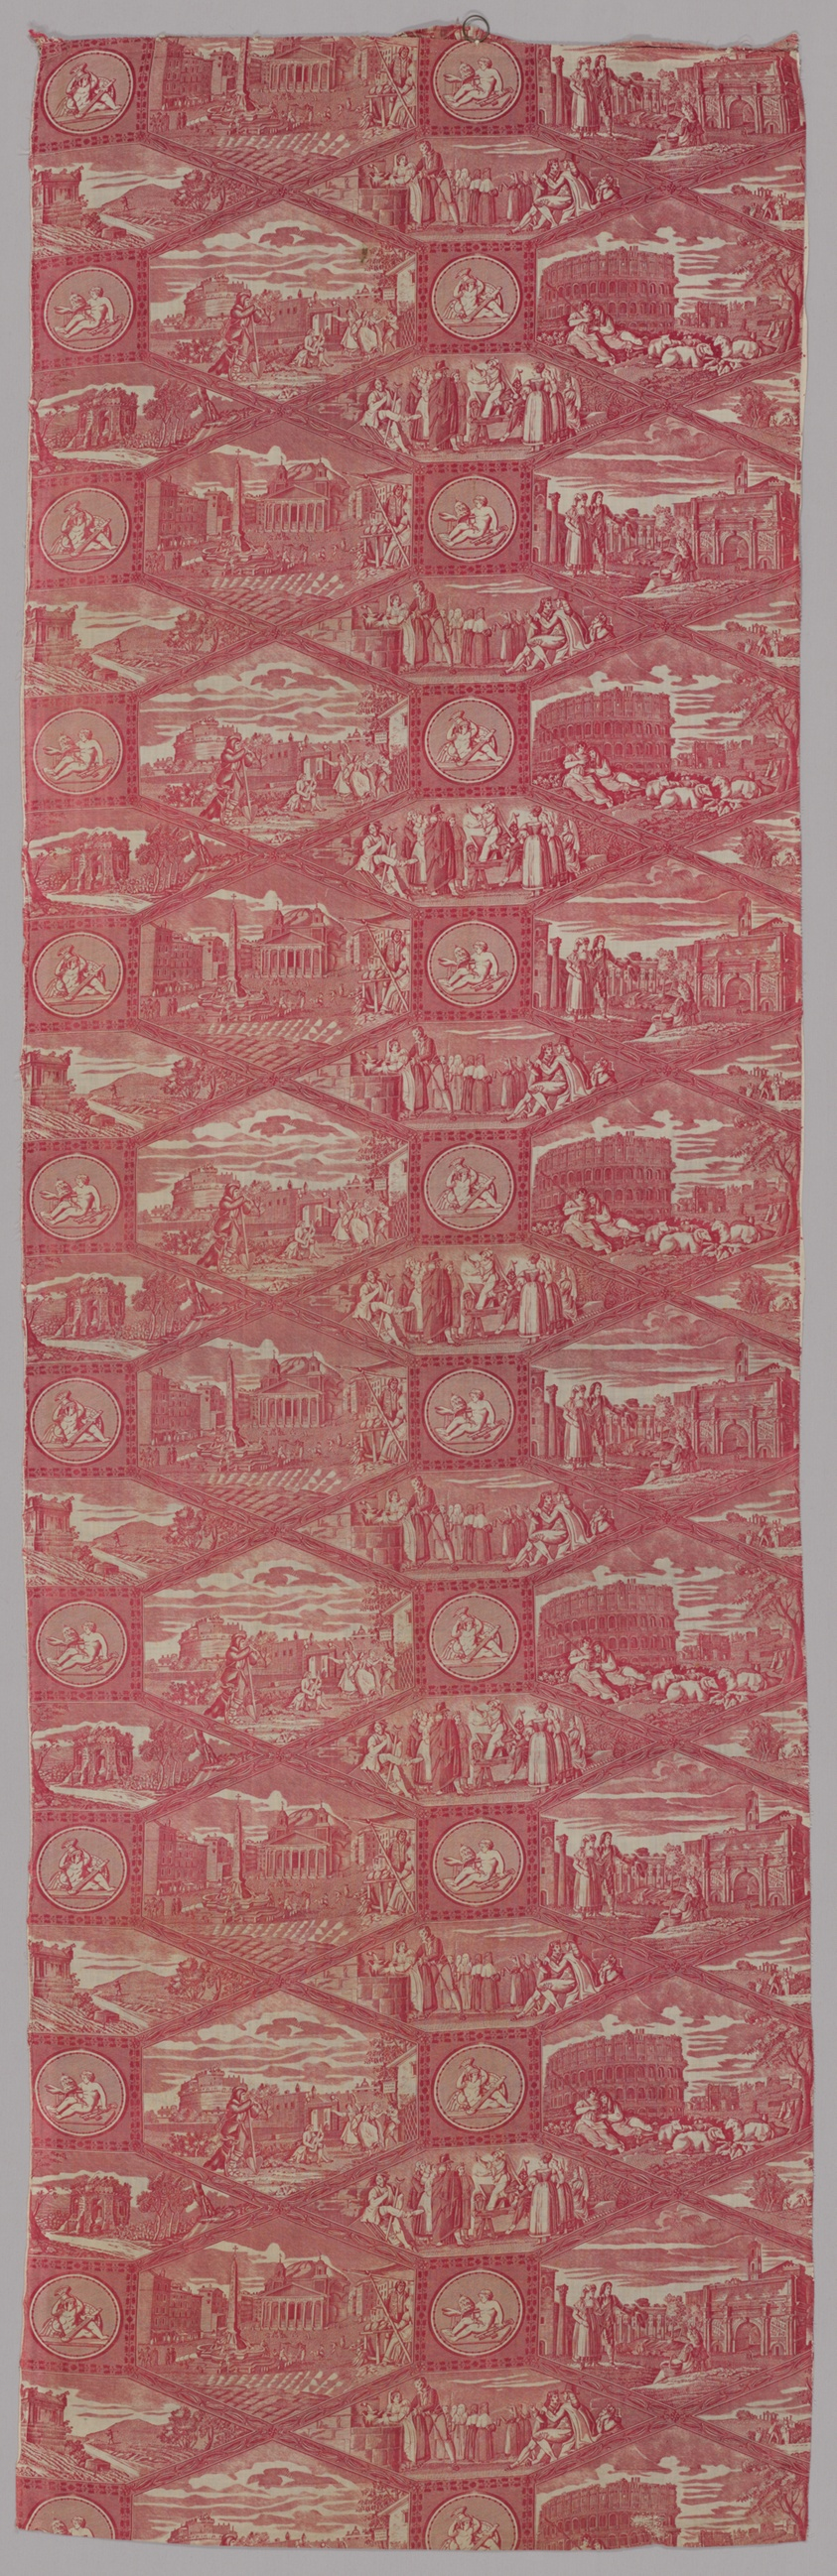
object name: Textile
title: “Scenes of Rome” Furnishing Fabric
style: Neoclassicism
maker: France, Rouen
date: c. 1815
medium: Cotton; engraved roller printed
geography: France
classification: textile; printed textile; furnishing textile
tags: Rome, circles, buildings, people, couples, Italy